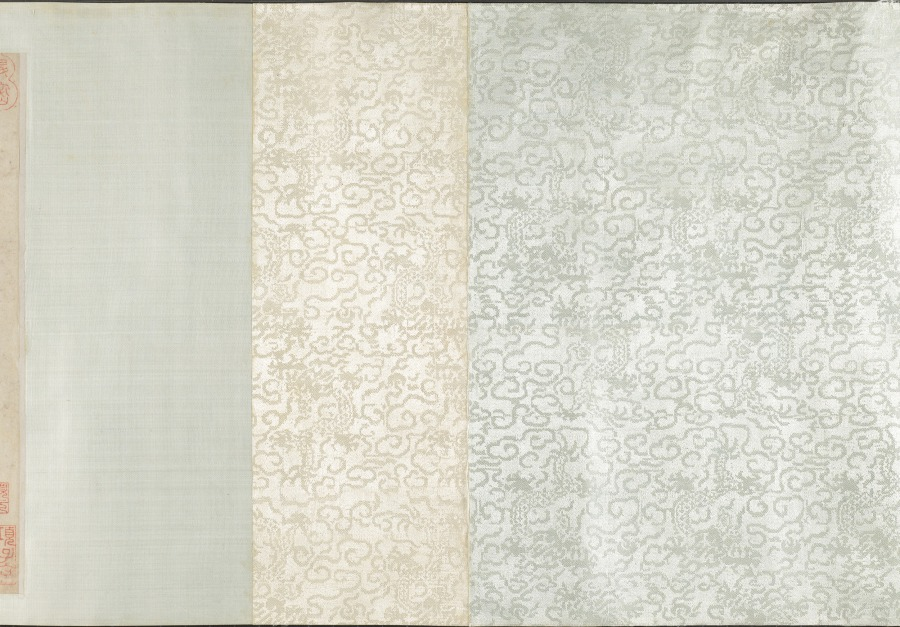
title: Garden for Solitary Enjoyment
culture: China, Ming dynasty (1368–1644)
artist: Qiu Ying (Chinese, 1494–1552)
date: 1515–52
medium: Handscroll; ink and light color on silk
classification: Painting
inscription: Accompanying text of an essay together with seven poems of Sima Guang (1019–1086) and one poem of Su Shi (1037–1101) written by Wen Zhengming (1470–1559) in 1558.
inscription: 2 colophons and 82 seals: 4 seals of Wen Zhengming 文徵明 (1470–1559); 59 seals of Xiang Yuanbian 項元汴 (1525–1590); 1 colophon, dated 1644, and 7 seals of Xiang Yukui 項禹揆 (c. late 1500s–1659); 1 colophon, dated 1880, and 2 seals of Weng Tonghe 翁同龢 (1830–1904); 2 seals of Ch'eng Chen-i (19th c.); 1 seal of Han Ch'ung (19th c.); 4 seals of Wan-go H. C. Weng 翁萬戈 (1918–2020); 3 seals unidentified.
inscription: Colophon by Xiang Yukui 項禹揆 (c. late 1500s–1659): The painting of The Garden for Self-enjoyment on the right by Shih-chou, Mr. Qiu [Qiu Ying] is in the style of Li Lung-mien. Its mood is peaceful, as if meeting the ancient gentlemen face to face among the brushes and silk; it lifts one above the sordid bustle of life. Formerly, my late father handed me this scroll which had only the painting without the written essay. I considered asking a good calligrapher to write the essay to add to it but was afraid that the quality of the writing would not match the painting. Several years later, I saw at a friend's house this essay and poems (of Ssu-ma Kuang] written by Hengshan [Wen Zhengming], once owned by my grandfather; so I spared no expense to obtain it. I rejoiced at this and said: "The divine swords are finally united. How things are pre-destined!" Now my friend Chang Kung-chao's technique for mounting [painting and calligraphy] is excellent. Therefore by daring to take them out and join them together, I can preserve this beautiful story of singular reunion. Xiang Yukui recorded at Hai-yeh-t'ang [hall] two days before New Year's Eve in the jiasheng year of the Chongzhen era [1644]. trans. LYSL/HK/WKH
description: Garden of Solitary Enjoyment refers to a site built in 1073 by the statesman Sima Guang (1019–1086) after he had retired to Luoyang, Henan province. Every spring, visitors would flock to his garden. Each of its seven structures references a historic figure. Sima wrote: I channel streams [like Du Mu], to water flowers [like Bai Juyi], or trim bamboo [like Wang Huizhi]. . . . I know of no joy between heaven and earth that could take its place. Qiu Ying’s painting, created after an 11th-century version of the same theme, must have appealed to garden owners of the Ming dynasty, since it became the template for numerous Suzhou workshop copies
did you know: Sima Guang completed his monumental survey of Chinese history, Zizhi tongjian, in the garden depicted in this painting.